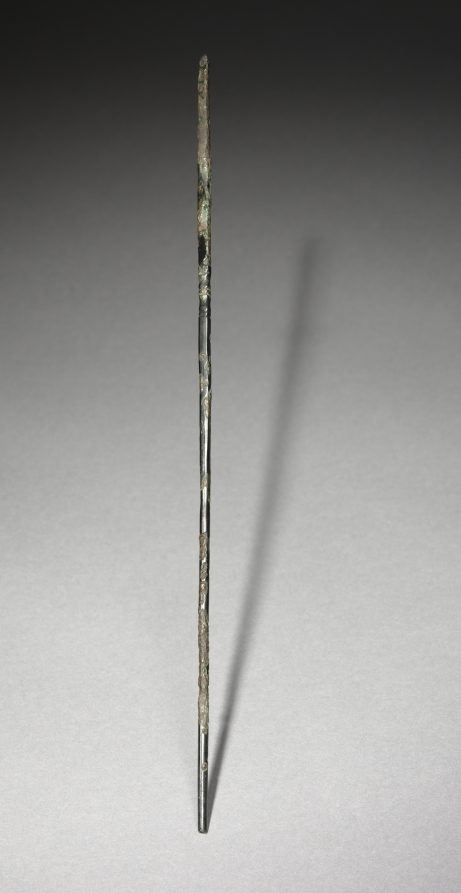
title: Chopstick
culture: Korea, Goryeo dynasty (918–1392)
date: 918–1392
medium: bronze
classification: Metalwork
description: In Korea, chopsticks made of metal such as brass, silver, and gold were excavated from ancient tombs and ruins dated to the 6th century at the earliest. Burial goods often include utilitarian objects such as table wares and utensils because the dead were believed to need them in the afterlife.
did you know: In contrast to the Chinese and Japanese, Koreans still prefer metal chopsticks (stainless steel and brass) to wooden ones.